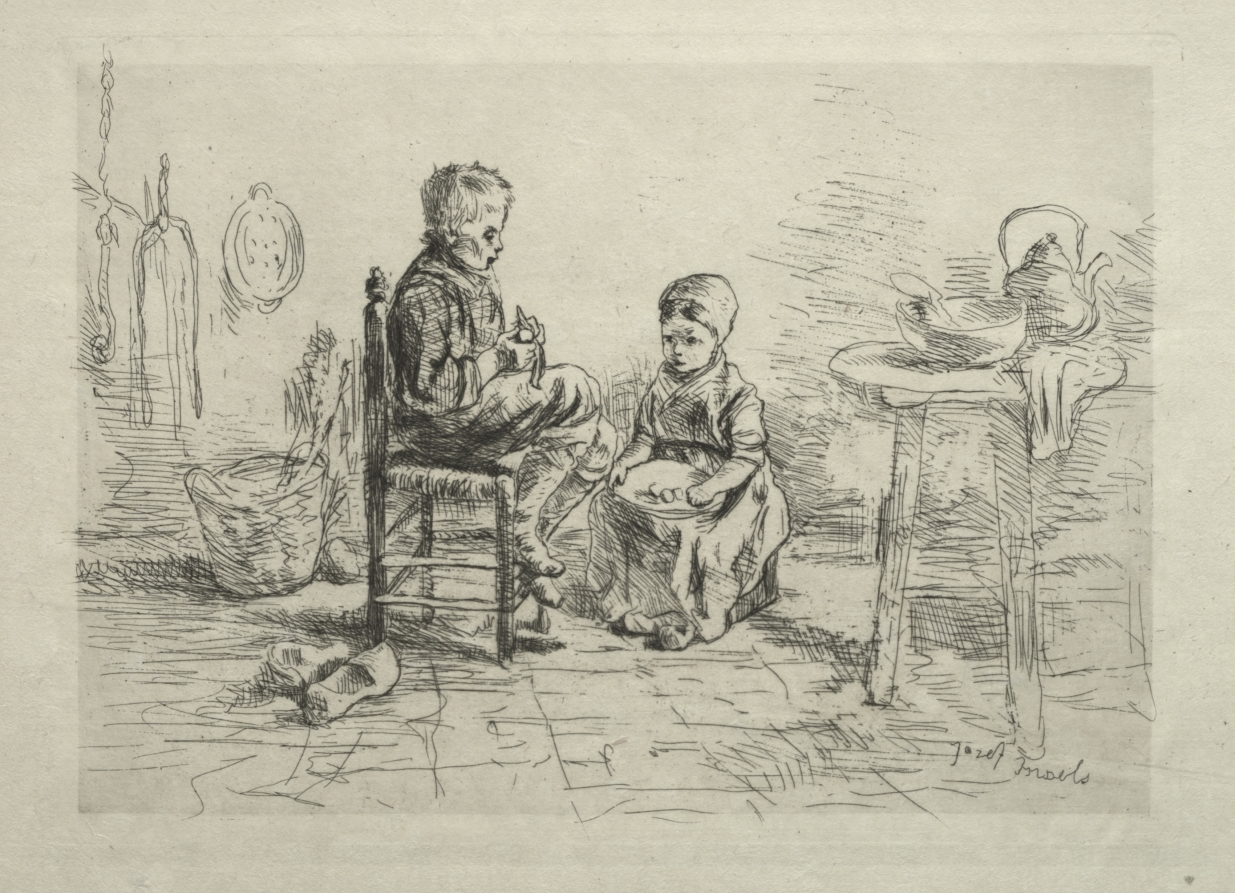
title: Peeling Potatoes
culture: Netherlands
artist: Jozef Israëls (Dutch, 1824–1911)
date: c. 1880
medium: etching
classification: Print